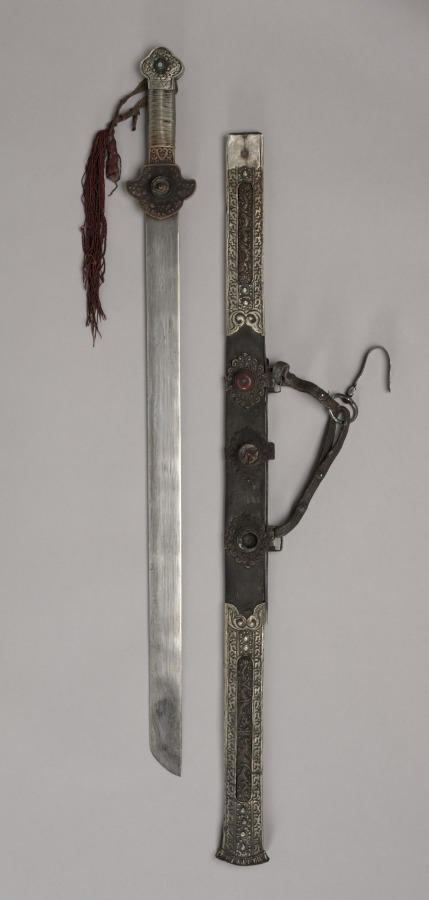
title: Sword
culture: Eastern Tibet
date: 1800s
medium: iron and silver with bone, turquoise, leather and brass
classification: Arms and Armor